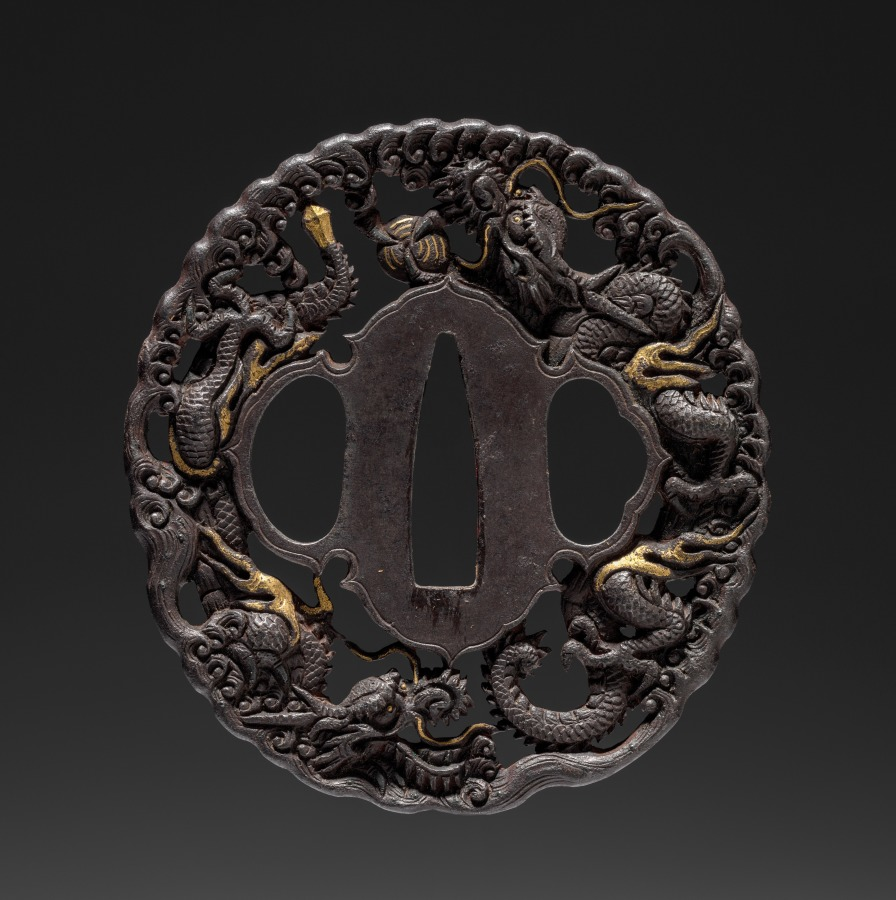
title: Sword Guard (Tsuba) with Dragons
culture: Japan, possibly Edo period (1615-1868)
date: c. 1615–1868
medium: iron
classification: Arms and Armor